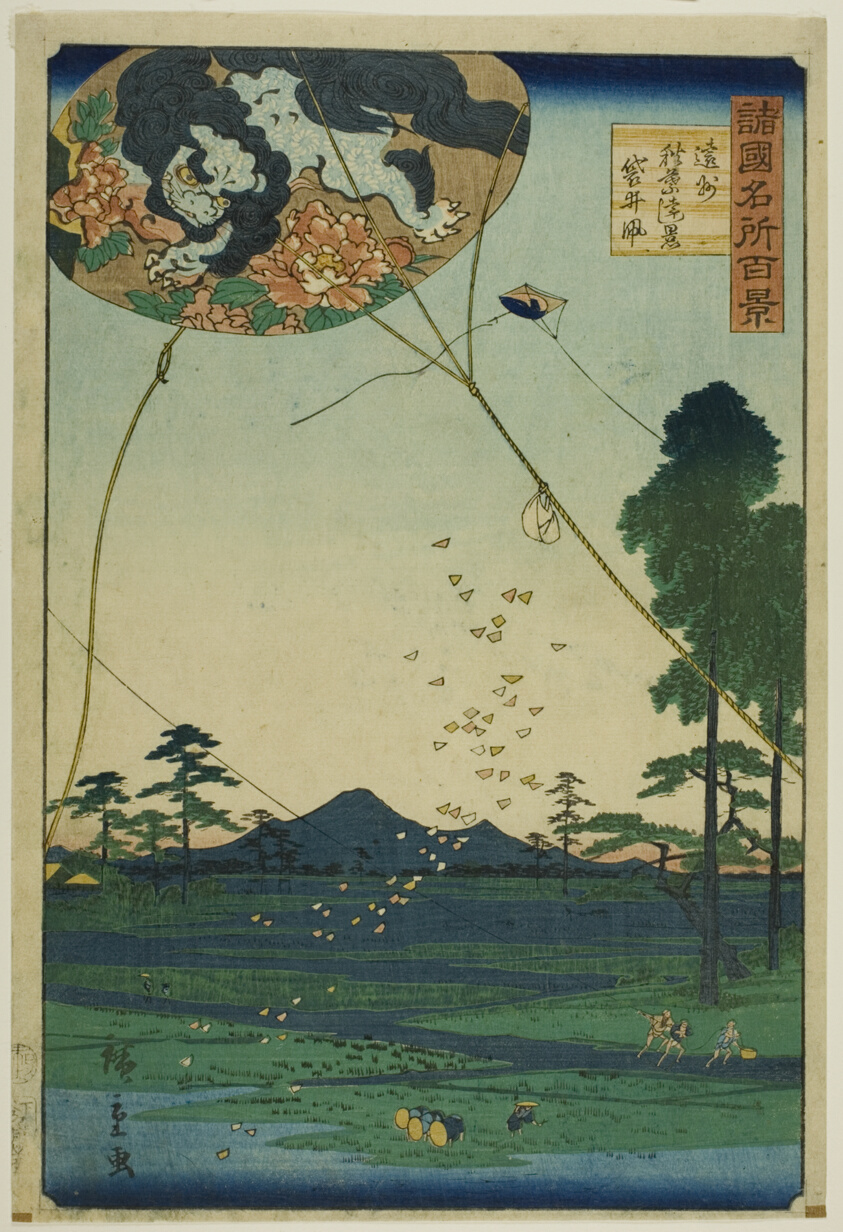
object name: Print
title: Kites of Fukuroi and Distant View of Akiba in Totomi Province (Enshu Akiba enkei Fukuroi tako), from the series "One Hundred Famous Views in the Various Provinces (Shokoku meisho hyakkei)"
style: Japanese (culture or style)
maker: Utagawa Hiroshige II (Shigenobu) (Japanese, 1826–1869)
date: 1859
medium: Color woodblock print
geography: Japan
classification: woodblock print; print